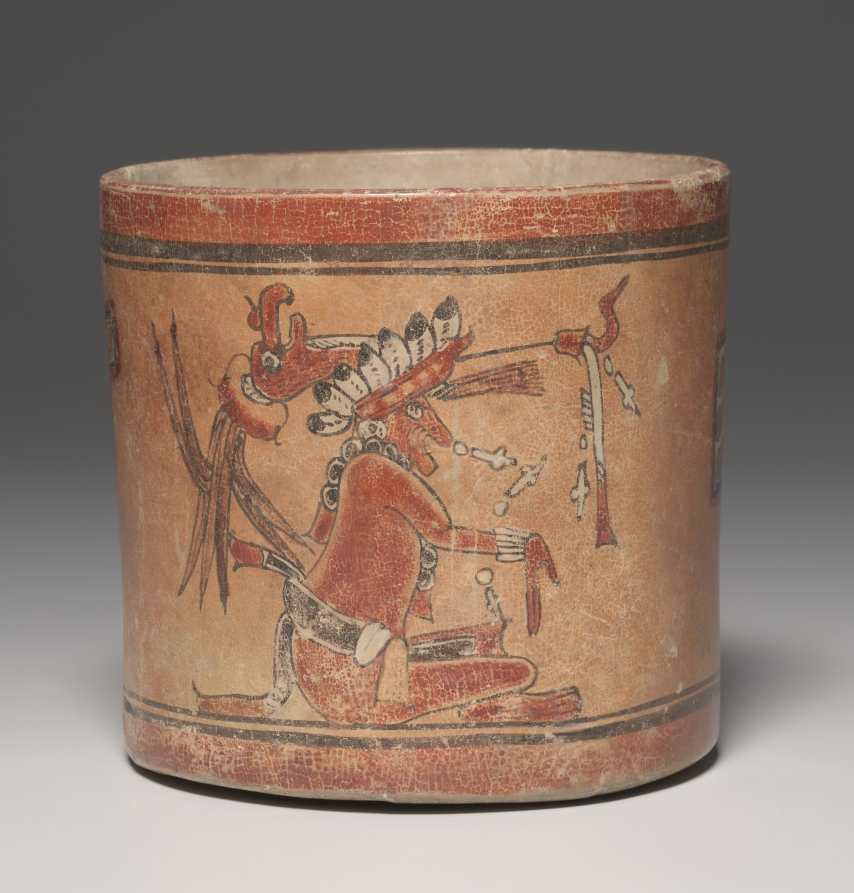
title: Cylinder Vessel with Deities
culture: Guatemala, Kixpek, Maya (Chamá) style (250-900)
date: 600–900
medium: earthenware with colored slips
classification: Ceramic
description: Between AD 600 and 900, Maya cities and towns mushroomed in number, interacted, and competed. Since a distinctive ceramic painting style was part of many centers' identities, the number of styles exploded and painted pottery became a hallmark of the era. This vessel, painted with a ruler's patron deity (God K), is of a style produced briefly in one area of Guatemala's Chamá Valley.